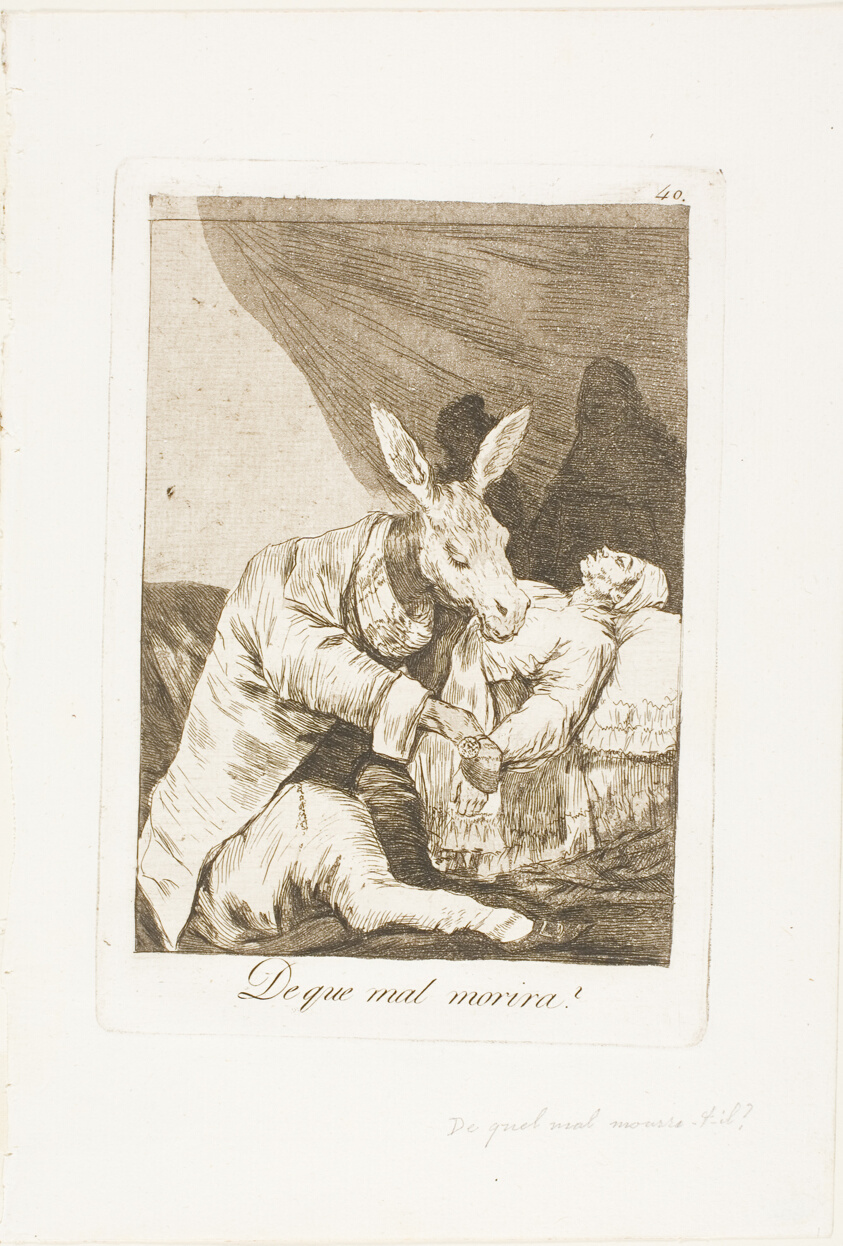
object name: Print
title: Of what ill will he die?, plate 40 from Los Caprichos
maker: Francisco José de Goya y Lucientes (Spanish, 1746-1828)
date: 1797–98, published 1799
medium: Etching and aquatint in brown on ivory laid paper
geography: Spain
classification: etching; print; prints and drawing